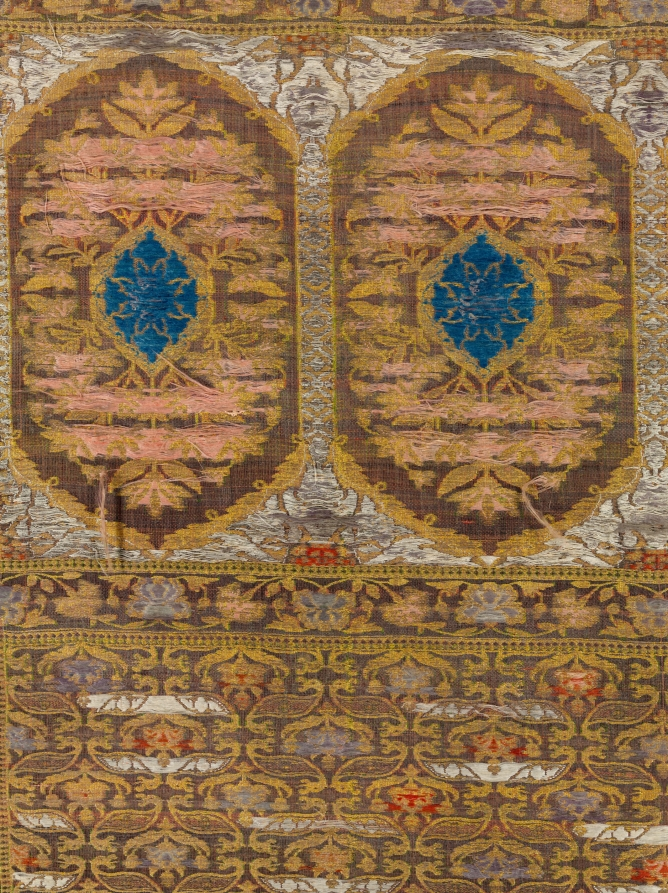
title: Sash with floral field and end panels on a gold ground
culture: Iran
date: 1700s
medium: taqueté with discontinuous wefts: silk, gilt- and silver-metal thread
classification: Textile